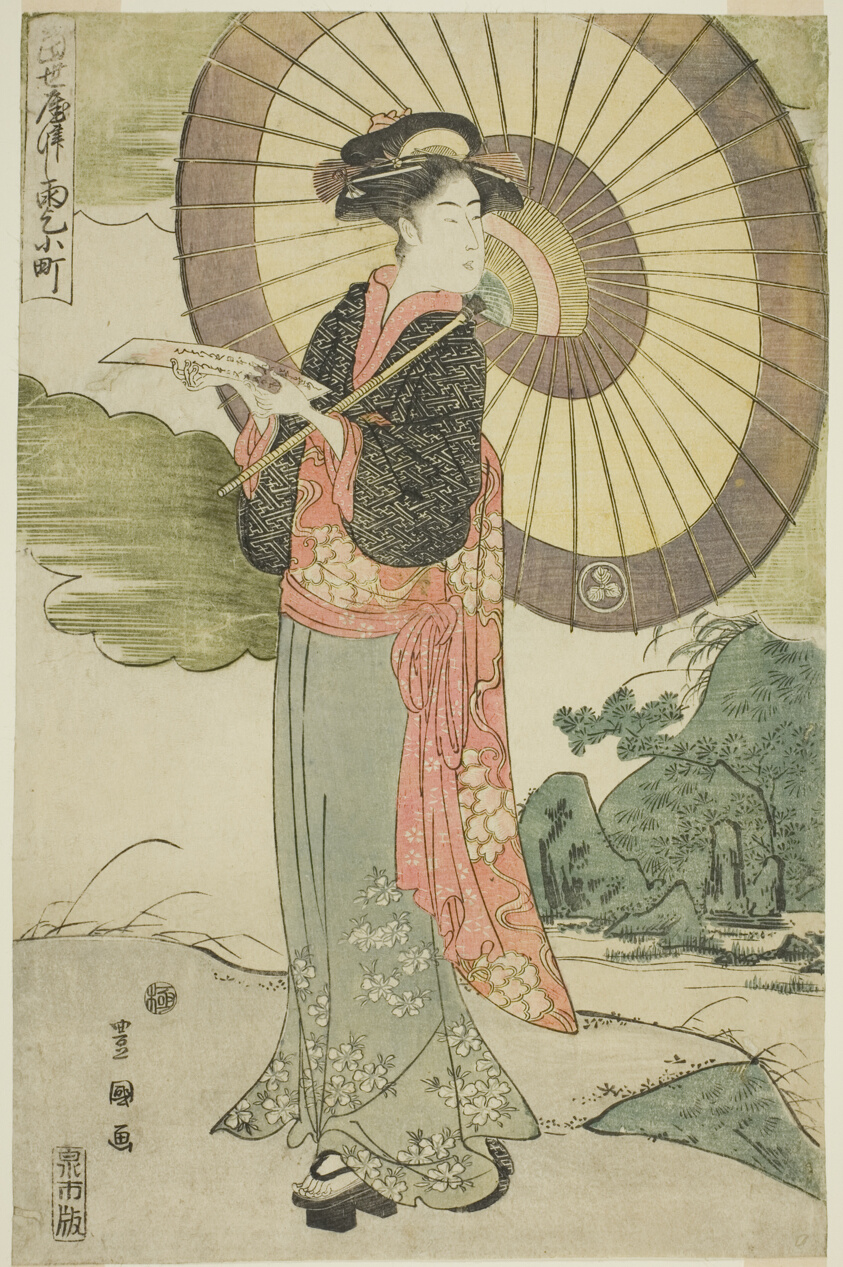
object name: Print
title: A Contemporary Parody of Komachi Prays for Rain (Tosei yatsushi Amagoi Komachi)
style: Japanese (culture or style)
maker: Utagawa Toyokuni I 初代 歌川 豊国; Japanese, 1769–1825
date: c. 1792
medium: Color woodblock print; oban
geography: Japan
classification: woodblock print; print; asian art